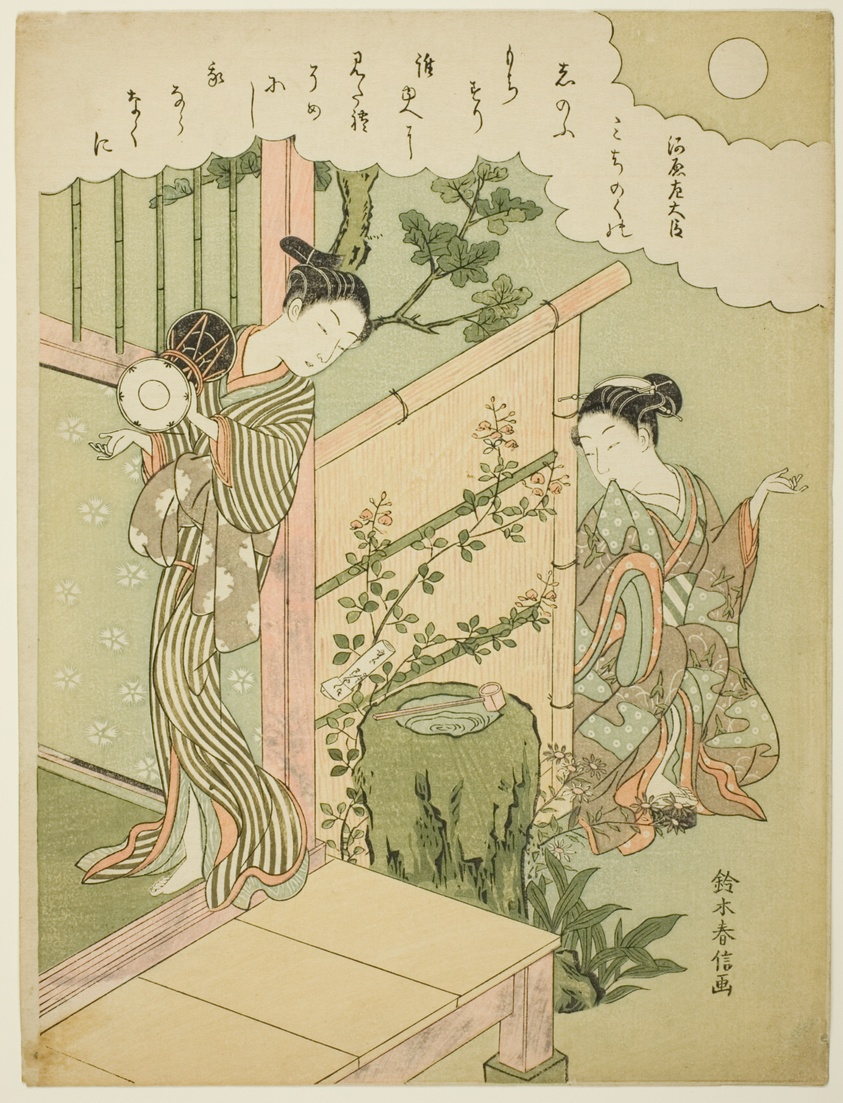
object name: Print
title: Poem by Kawara no Sadaijin, from an untitled series of One Hundred Poems by One Hundred Poets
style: Japanese (culture or style)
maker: Suzuki Harunobu 鈴木 春信; Japanese, 1725 (?)-1770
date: c. 1767/68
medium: Color woodblock print; chuban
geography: Japan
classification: woodblock print; print; asian art